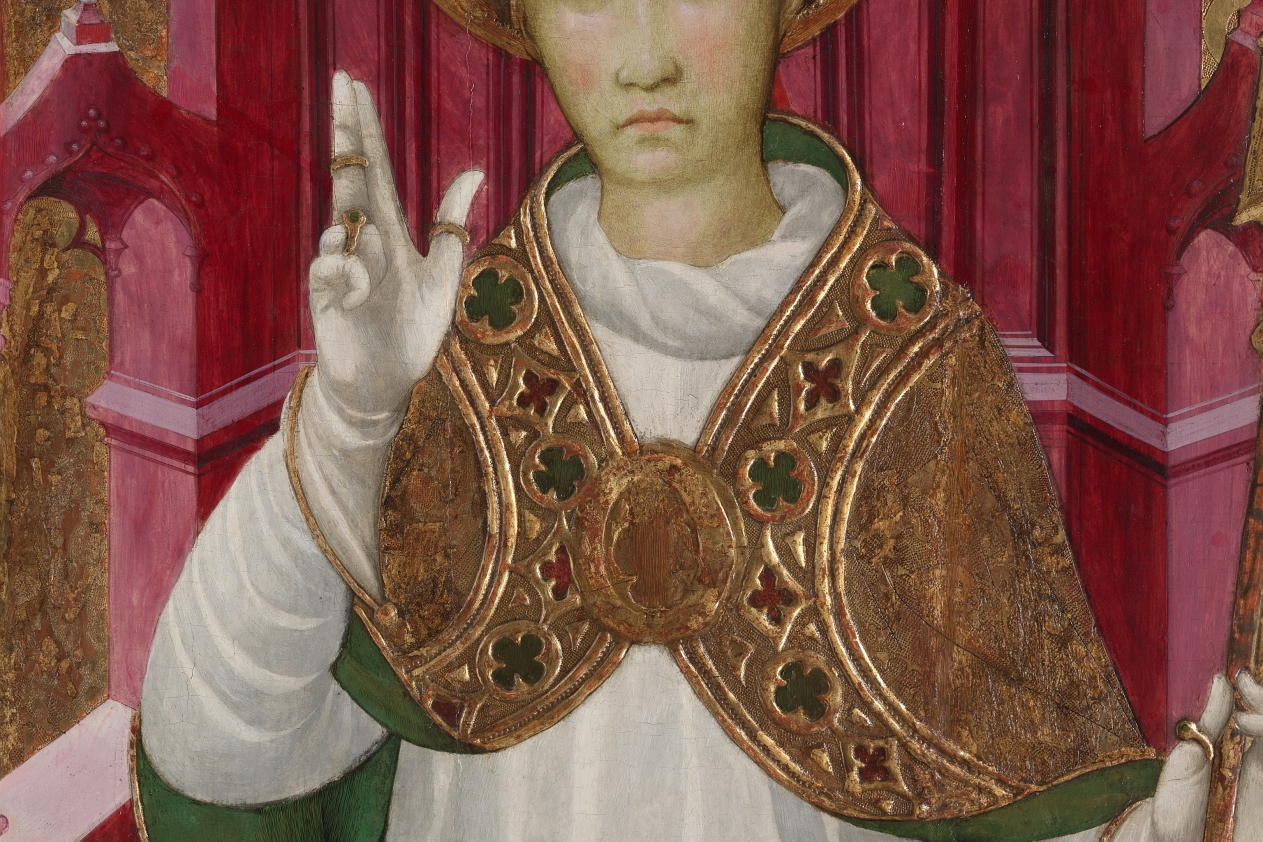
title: A Bishop Saint with a Donor (Saint Louis of Toulouse?)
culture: Spain, Catalonia, early 15th century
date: early 1400s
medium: tempera with raised and gilded gesso on wood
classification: Painting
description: The style of this painting suggests that it comes from Catalonia in northeastern Spain, though the identity of its artist remains unknown. The painting represents a youthful bishop-saint identifiable by a bishop’s symbols of authority, his miter and crozier. He wears rich vestments. Below, the figure in black represents the donor of the painting—likely a wealthy layperson rather than a cleric. The identity of the saintly bishop is speculated to be Saint Louis, Bishop of Toulouse, on the basis of his youth. Louis was consecrated Bishop of Toulouse in 1297, died six months later at the age of 23, and was canonized in 1317. His relics were moved in 1423 to Valencia and his cult flourished in Spain.